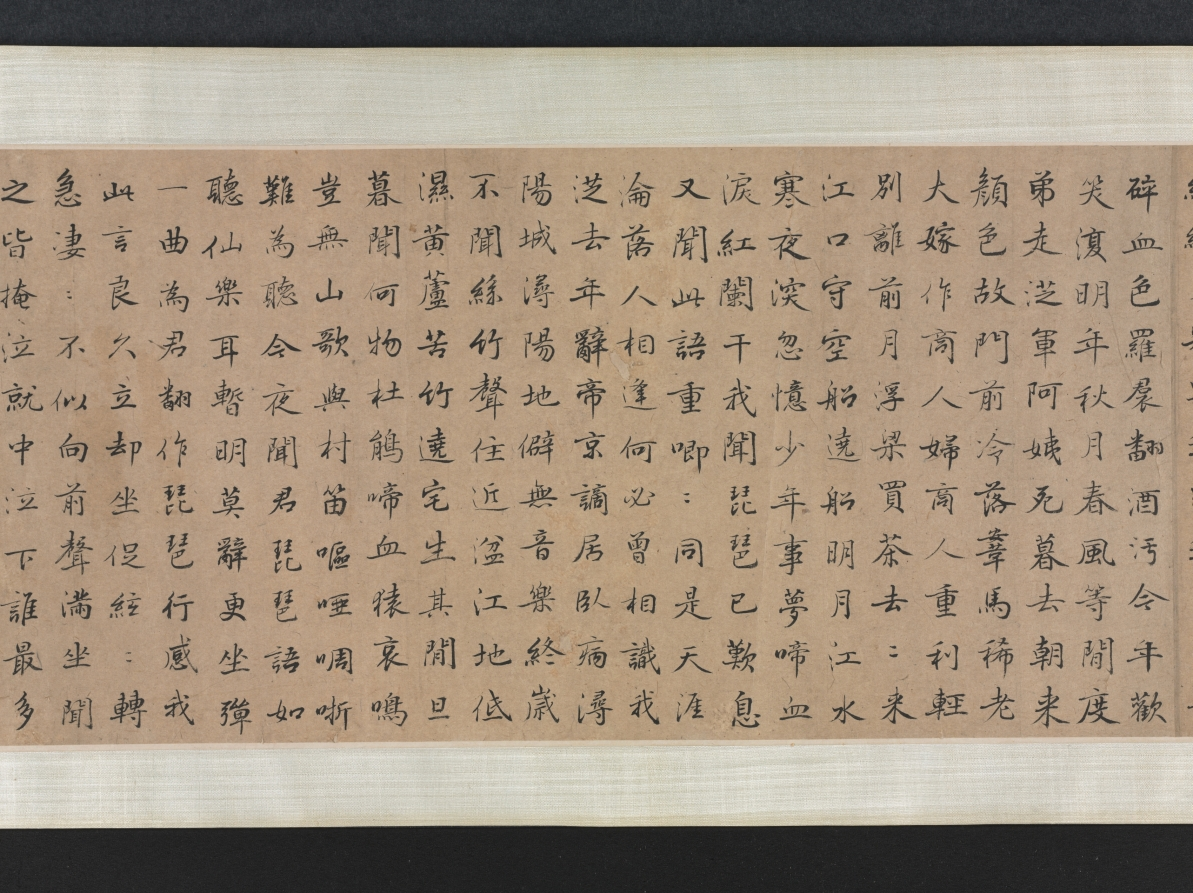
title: Saying Farewell at Xunyang (Song of the Pipa)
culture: China, Ming dynasty (1368–1644)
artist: Wen Boren (Chinese, 1502–1575)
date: 1500s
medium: handscroll, ink and color on paper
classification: Painting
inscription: "潯陽送客圖" 五峰山人文伯仁寫于停雲館中 [印] 文伯仁; 五峰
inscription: 2 colophons and 9 additional seals: 1 transcription of "Pipa xing 琵琶行” (Song of Pipa) and 3 seals of Zhu Yizun 朱彜尊 (1629-1709); 2 seals of Wu Rongguang 吳榮光 (1773-1843); 1 colophon, dated 1826, and 3 seals of Wu Xijia 吳錫嘉 (mid-1700s)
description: This handscroll depicts The Song of the Pipa, a poem by Bai Juyi 白居易 (772–846) written after the poet’s encounter with a pipa player on the Yangzi River. Expelled from her home city when her beauty and fame had faded, she played for the poet at night. Her musical performance and tragic life story resonated with Bai Juyi, who had just been demoted and exiled from life at court himself. The hazy, vast view and pale color tonalities of this painting illustrate these feelings of endless sadness, having lost one’s sense of purpose in life.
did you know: Wen Boren depicted the chilly autumn water with a fishnet pattern.